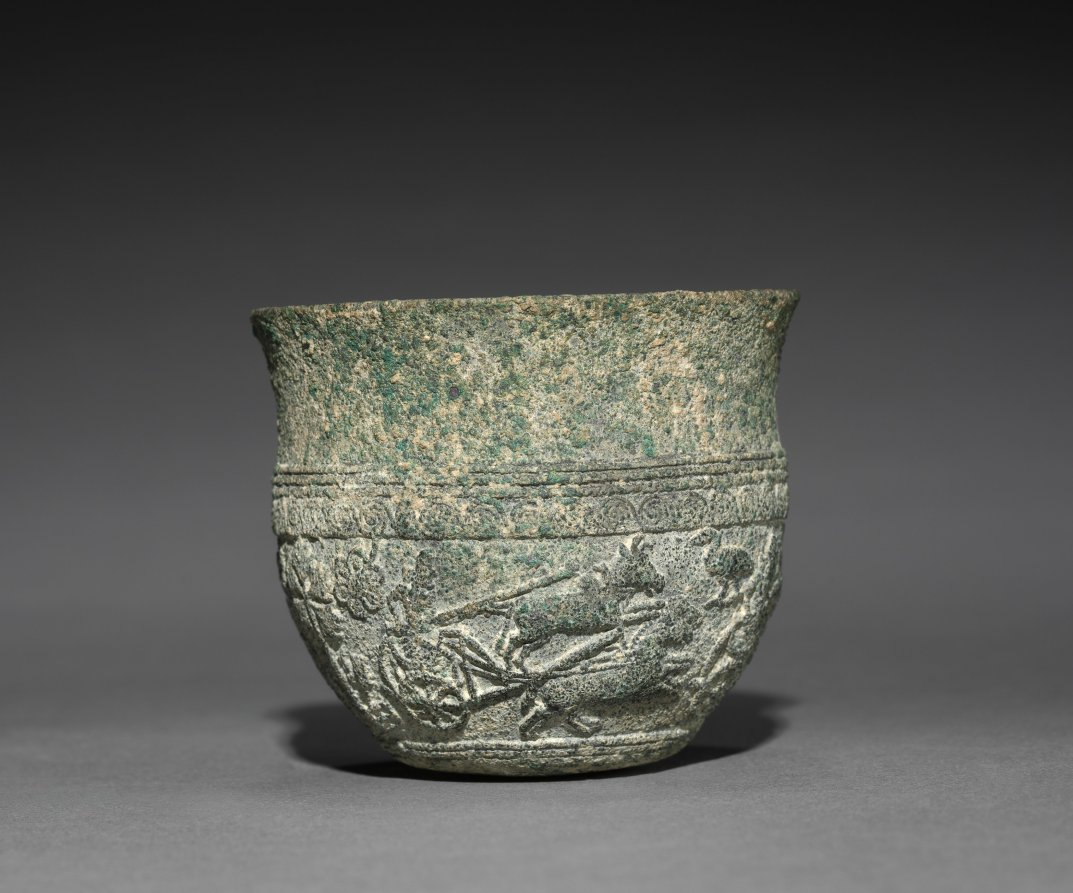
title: Libation Cup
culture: India, Maurya period (322–185 BCE)–Shunga period (185–78 BCE)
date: c. 235–185 BCE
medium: bronze, lost wax technique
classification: Metalwork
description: The remarkably clear, tiny carvings in an uninterrupted frieze around the lower section include one sacred palm tree and one fig tree (ficus religiosa) that divide the space into two main scenes. One features female musicians, the other has two chariots, each drawn by a pair of galloping horses. Bulls, birds, and flowers fill the background spaces. This cup is from a group found in an area with close links to Indo-Greek kingdoms, and the chariots and framing motifs reveal knowledge of Hellenistic art.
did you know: The tree carved into the cup is of the same species as the Bodhi tree, under which the Buddha reached enlightenment.